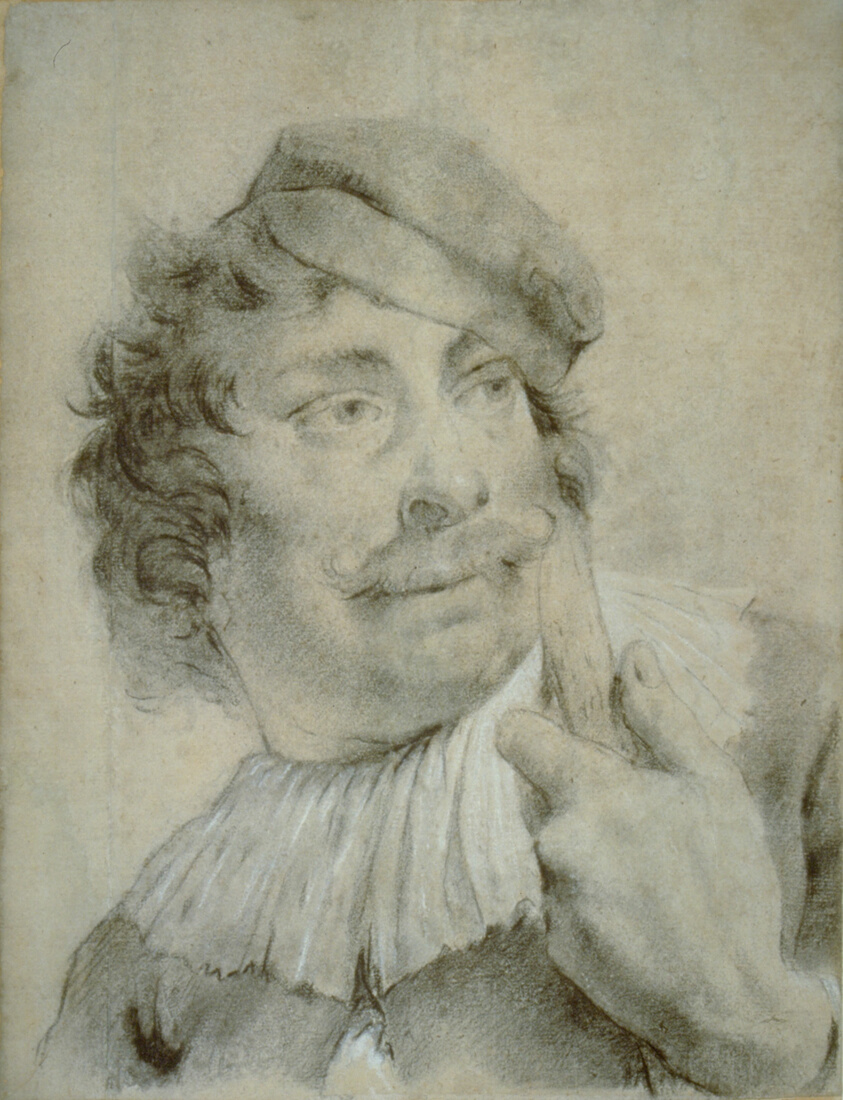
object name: Drawing and Watercolor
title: Portrait of a Gondolier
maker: Giovanni Battista Piazzetta (Italian, 1682-1754)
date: c. 1730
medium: Black chalk, with stumping, heightened with touches of white chalk, on blue-gray laid paper, discolored to cream, laid down on cream wood-pulp board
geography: Italy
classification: chalk; drawings (visual works); prints and drawing